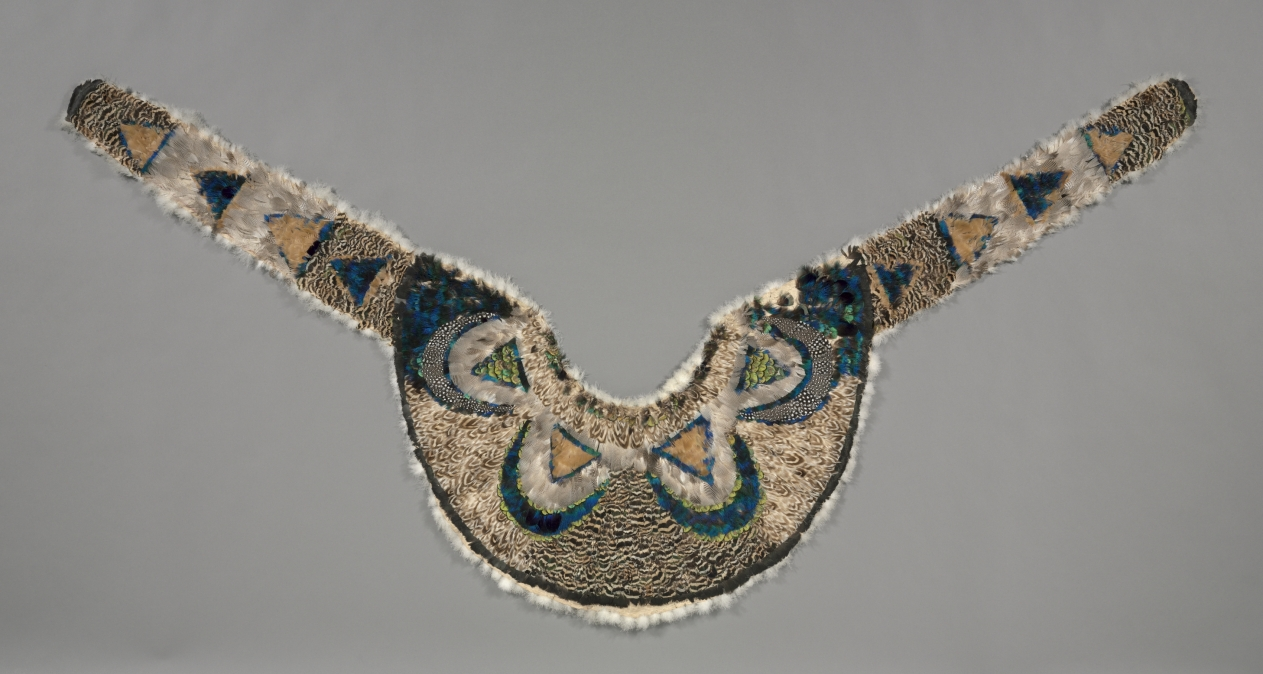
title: Pelerine (Collar or Cape)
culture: Northeastern Woodlands, Great Lakes/St. Lawrence River Region or Europe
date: c. 1830–1860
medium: Cotton, peacock feathers, guinea fowl feathers?, Gadwalls duck feathers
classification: Textile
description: Experts argue about collars of this type: Did a Great Lakes native artist make it, using as a model an English lady’s pelerine and exotic feathers obtained through trade? Or was the collar created by a European feather worker, perhaps after seeing the spectacular feather capes of native Hawaiian royals who visited England in 1824? There are arguments for both views—and for further research.